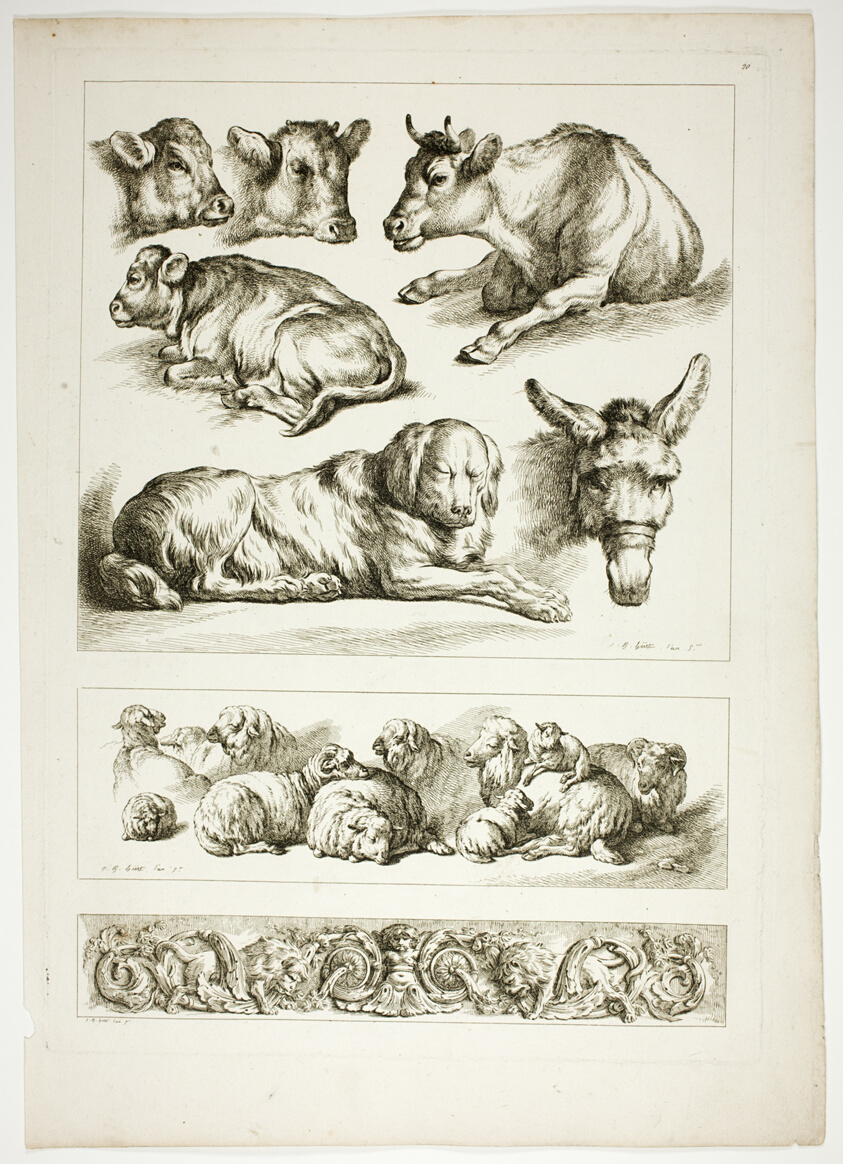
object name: Print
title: Plate Twenty of 38 from Oeuvres de J. B. Huet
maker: Jean Baptiste Huet (French, 1745-1811)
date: 1796–99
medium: Etching on paper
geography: France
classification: etching; print; prints and drawing